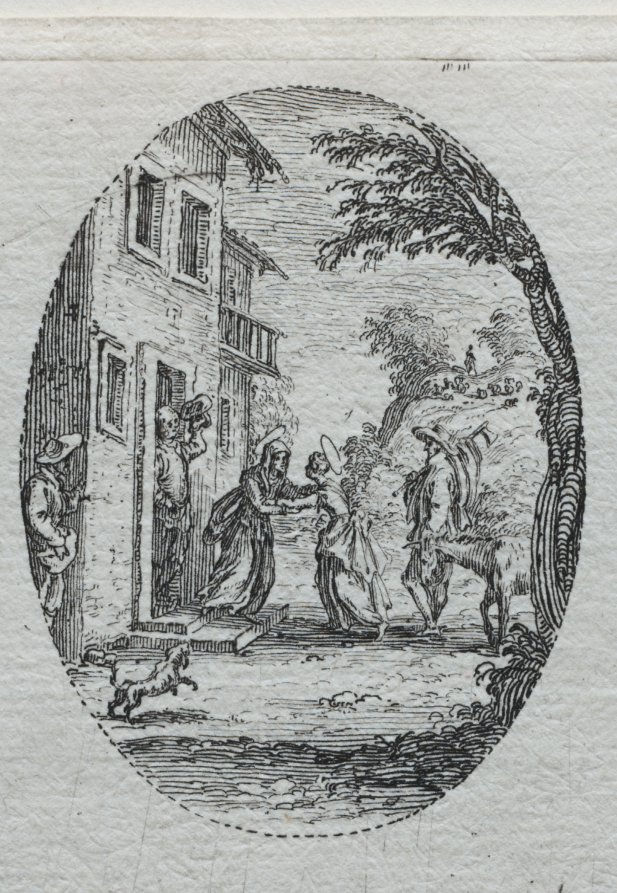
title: The Mysteries of the Passion: The Visitation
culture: France, 17th century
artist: Jacques Callot (French, 1592–1635)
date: 1631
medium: etching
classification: Print